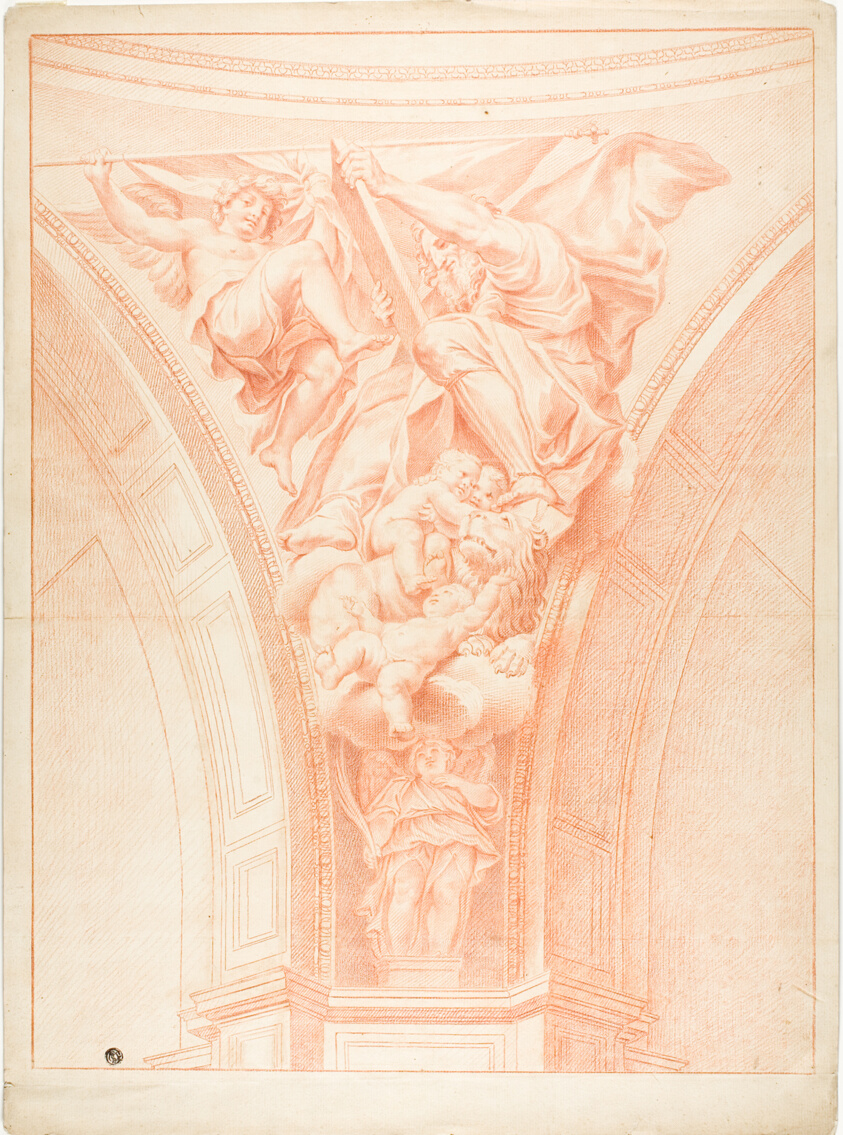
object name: Drawing and Watercolor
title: Saint Mark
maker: After Domenichino; Italian, 1581-1641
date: after 1627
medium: Red chalk on buff laid paper, laid down on cream laid paper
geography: Italy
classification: chalk; drawings (visual works); prints and drawing